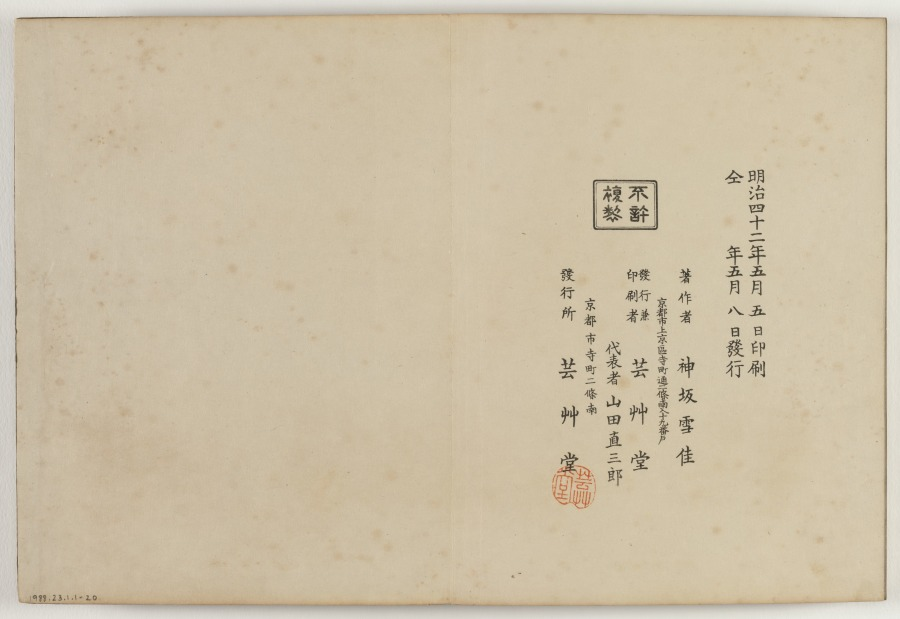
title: Flowers of a Hundred Worlds (Momoyogusa), Vol. 1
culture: Japan, Meiji period (1868–1912)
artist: Kamisaka Sekka (Japanese, 1866–1942)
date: 1909–10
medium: one of a set of three woodblock-printed folding-books; ink, color, gold, and silver on paper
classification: Bound Volume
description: This is the first of a set of three woodblock printed albums by Kamisaka Sekka, the artist considered the last major exponent of the Rinpa style of painting and design associated with the artists Tawaraya Sōtatsu (died about 1640) and Ogata Kōrin (1658-1716). Momoyogusa, in addition to meaning "flowers of a hundred worlds," is a classical name for the chrysanthemum. It appears in a poem by Mimube no Tarukuni (dates unknown) written in 755 and contained in the first Japanese imperial poetry anthology, Collection of Ten Thousand Leaves (Man'yōshū). In the poem, Tarukuni, who was posted in northern Kyushu as a guard at the time, asked a missed beloved in his home province to be well for a hundred nights, like the chrysanthemums growing in his parents' garden. Chrysanthemums are traditionally associated with longevity, and in some cases immortality. This volume of Sekka's series includes a preface poem by the Kyoto-based physician and poet Sugawa Nobuyuki (1839-1917) that may be glossed as follows: As we move forward in the spirit of the new age, "flowers of a hundred worlds" sown by seed, now blossom in distinctive colors and scents (translation by John T. Carpenter)